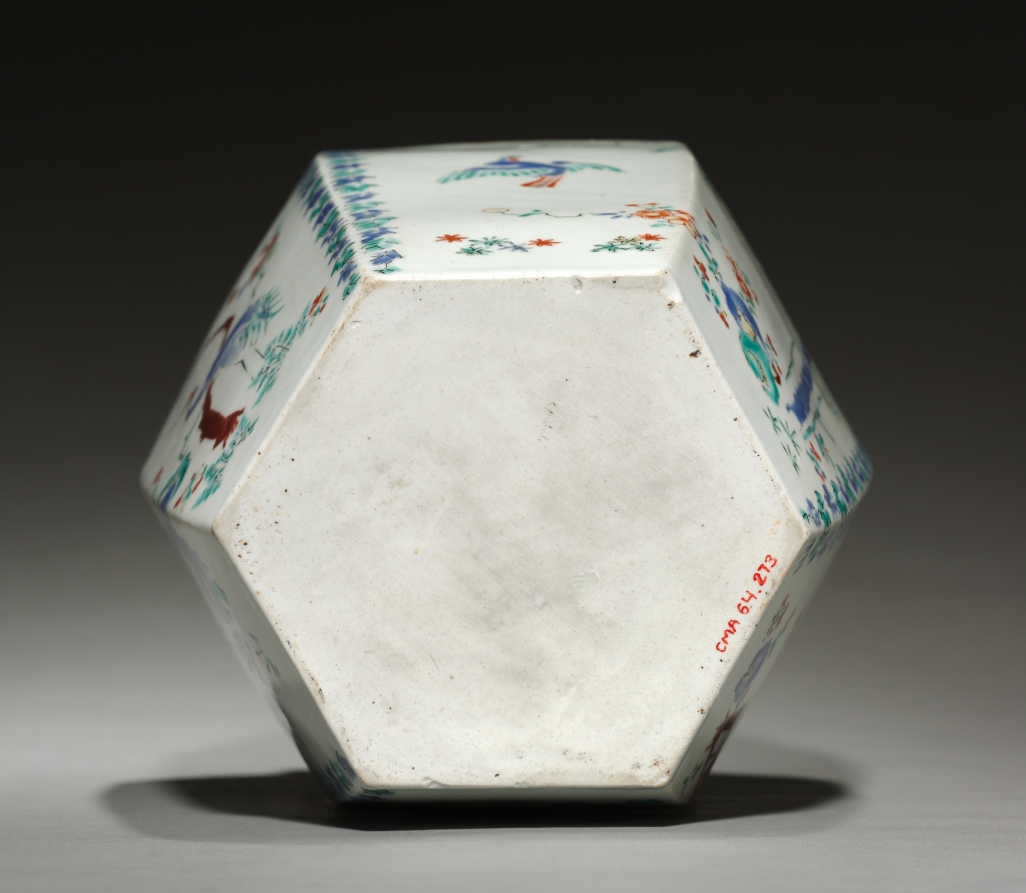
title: Hexagonal Jar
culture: Japan, Edo period (1615–1868)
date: late 1600s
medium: porcelain with overglaze enamel and gold decoration (Hizen ware, Kakiemon type)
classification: Ceramic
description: This pair of jars originally possessed domed lids. Their imposing size, shape, and Chinese-style décor identify them as products made for the European markets in England, Holland, France, and Germany. Indeed many similar examples can be seen in museum and historic house collections in those countries. Such Kakiemon ware also inspired domestic porcelain production in Europe in the 18th and 19th centuries.